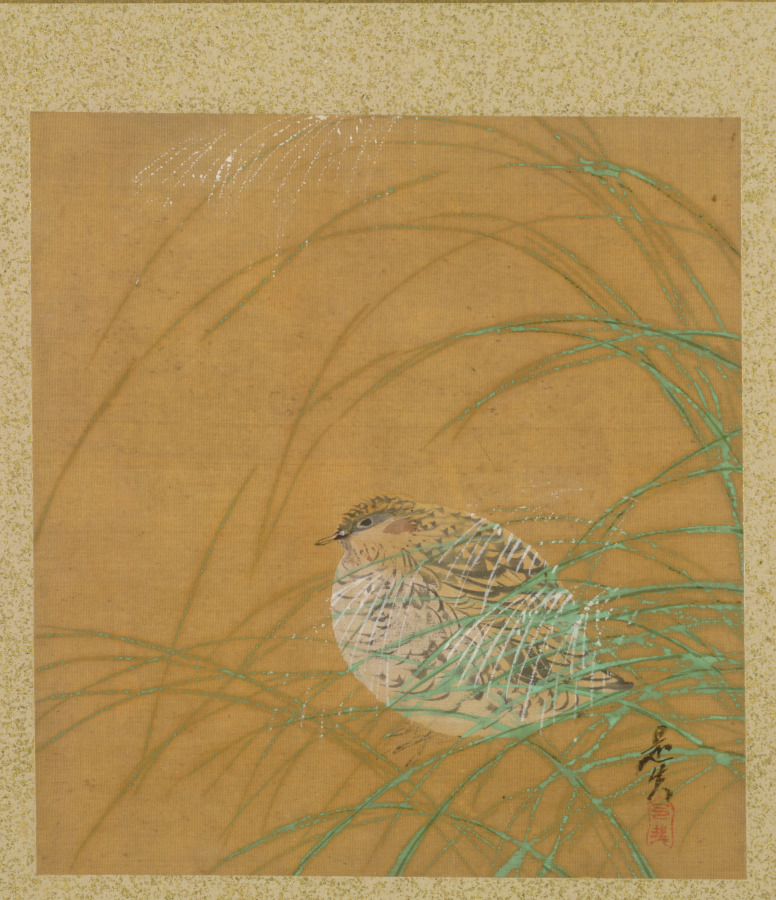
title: Quail in Grass from Album of Paintings by the Venerable Zeshin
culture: Japan, Edo period (1615–1868)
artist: Shibata Zeshin (Japanese, 1807–1891)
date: 1847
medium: leaf in accordion-style album; ink, color, and gold on silk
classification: Bound Volume